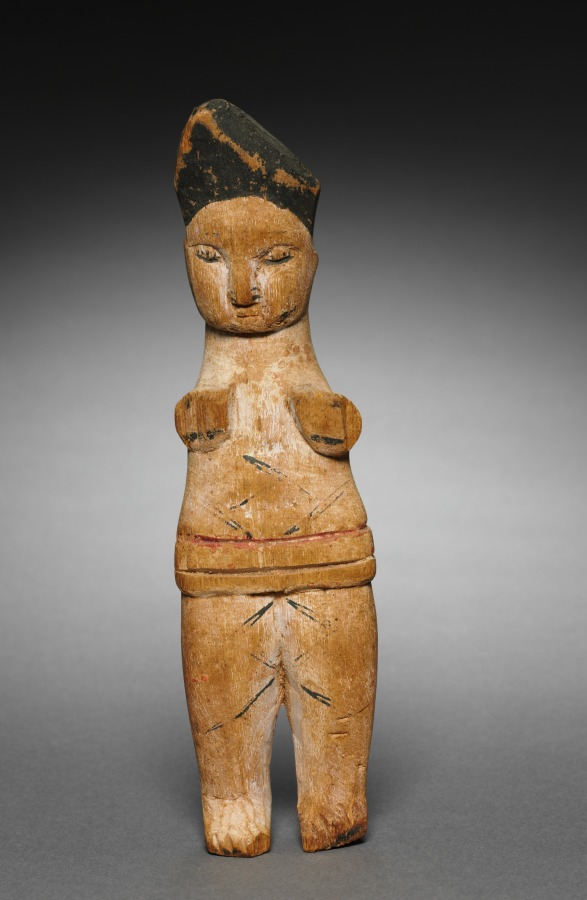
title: Pair of Dolls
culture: Africa, West Africa, Nigeria, Ibibio style, unknown artist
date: 1900s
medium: Wood, kaolin, and paint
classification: Sculpture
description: Young Ibibio girls would play with dolls for fun. They also took on deeper significance when a girl entered seclusion to go through preparations for adulthood and marriage, representing her future children and promoting her fertility. The kaolin (white clay) that once covered the figures' bodies has been worn off, possibly through handling during play. Thin lines represent uli, a kind of body painting. Upraised, foreshortened hands with open fingers were typical of dolls carved by Ibibio people from the Anang group.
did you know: Dolls like this were sold at markets where they were purchased as symbolic playthings for girls or souvenirs for tourists.